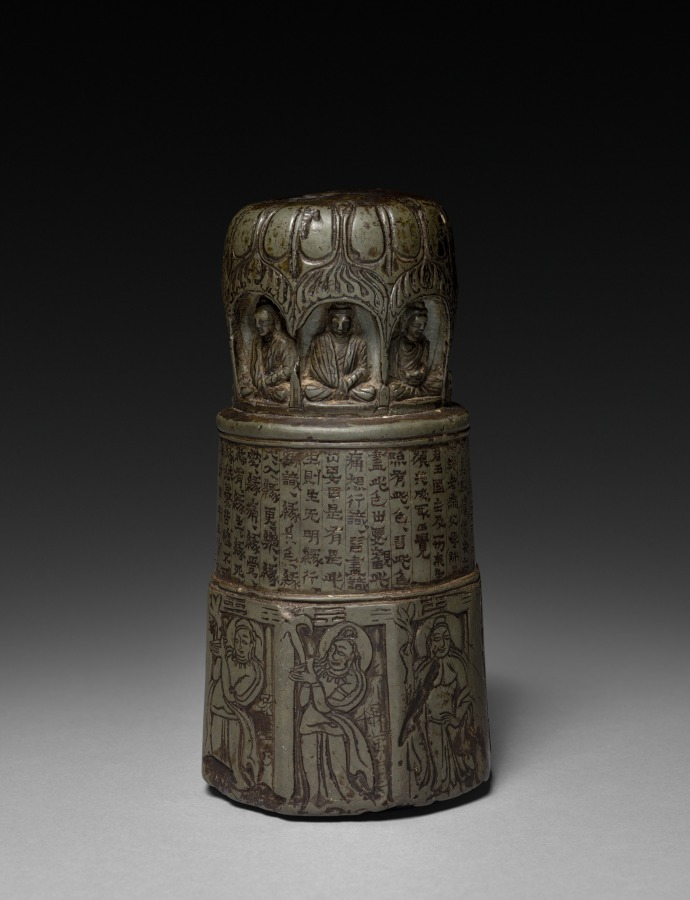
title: Miniature Votive Stupa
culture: China, Gansu province, Northern Wei dynasty (386-534)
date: 435 CE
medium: steatite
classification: Sculpture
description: This sutra pillar, inscribed with a sacred Buddhist text, belongs to a group of miniature stupas (jingta) that were found exclusively in the Gansu corridor, Northwest China. Ranging in date between AD 426–36, some of them bear the names of the lay Buddhist donors who commissioned them. A stupa is an architectural round structure built for the veneration of Buddhist relics. Miniature stupas may have commemorated the visit of a sacred site or represented donations to religious communities and sites.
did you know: There are trigrams, three horizontal lines, broken or continuous, above each of the eight bodhisattvas in the stupa's lower section.